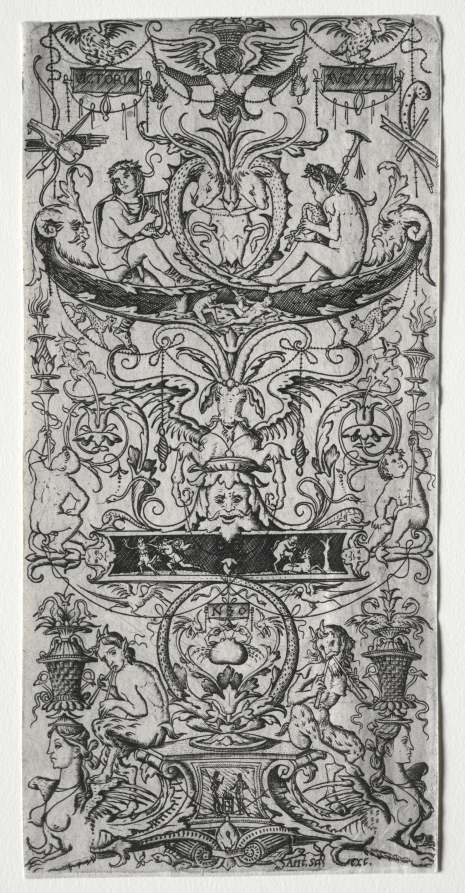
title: Ornament Panel Inscribed Victoria Augusta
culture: Italy, 16th century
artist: Nicoletto da Modena (Italian, active c. 1500–1520)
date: c. 1507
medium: engraving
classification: Print